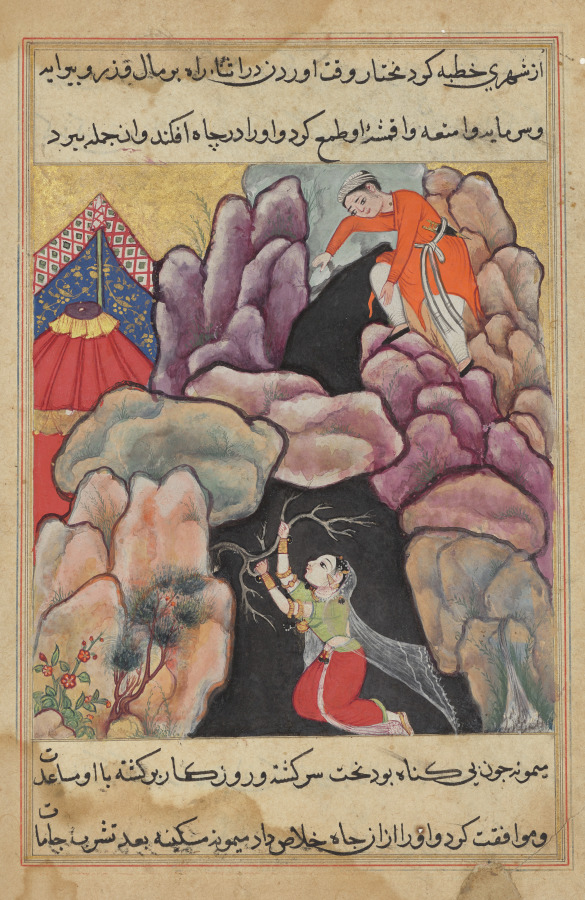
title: Mukhtar throws his wife Maimuna into the pit, but she saves herself, from a Tuti-nama (Tales of a Parrot): Twenty-fifth Night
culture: Mughal India, court of Akbar (reigned 1556–1605)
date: c. 1560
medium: gum tempera, ink, and gold on paper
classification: Painting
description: Maimuna clings to a branch in a dark pit while her villainous husband watches from above. He threw her into the pit in an attempt to steal her possessions. However, because Maimuna was guiltless, luck and fate saved her from an untimely death.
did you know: The artist shows the mouth of the pit at the top and in cross-section below.